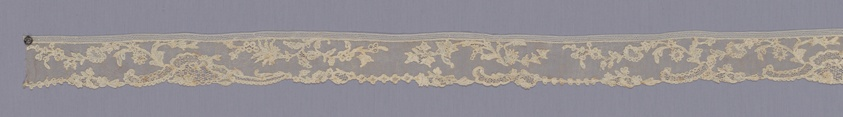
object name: Textile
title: Border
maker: France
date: 1750s/60s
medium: Linen, needle lace of a type known as "Point d'Alençon"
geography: France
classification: textile; lace - needle; lace